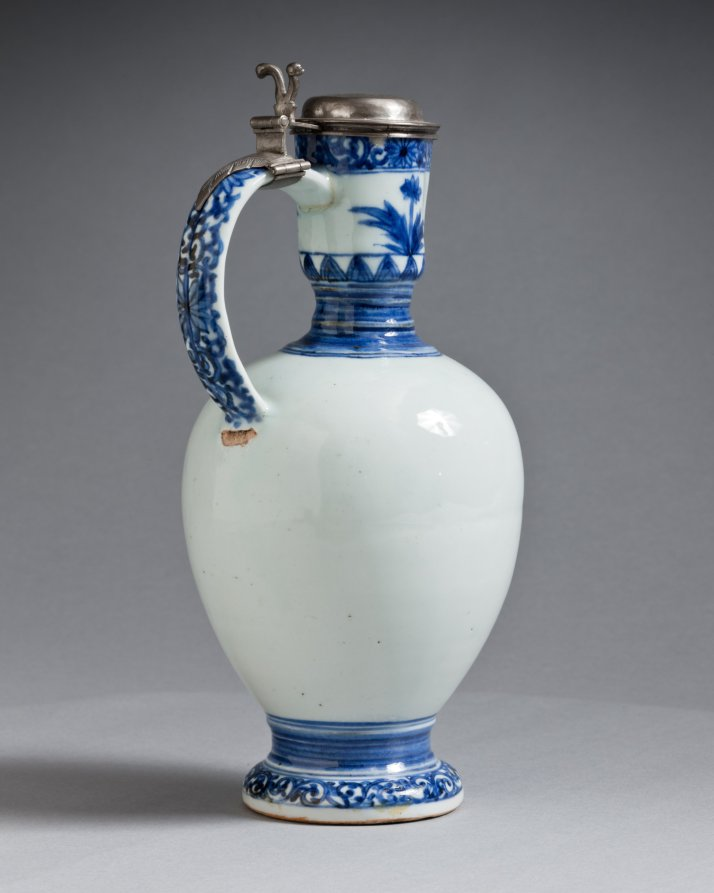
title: Jug with Silver Mounts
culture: Japan, Edo period (1615–1868)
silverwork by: Barent van Leeuwen (Dutch, 1637–1682)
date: c. 1662–76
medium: porcelain with underglaze blue decoration and silver mounts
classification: Ceramic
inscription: [on silver]: town mark for Amsterdam; lion rampant crowned (alloy mark for 0-934 silver); d (date letter for 1666), maker's mark of Barent van Leeuwen.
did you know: The coat of arms on this jug are those of the Valckenier family, active in the Dutch East India Company.